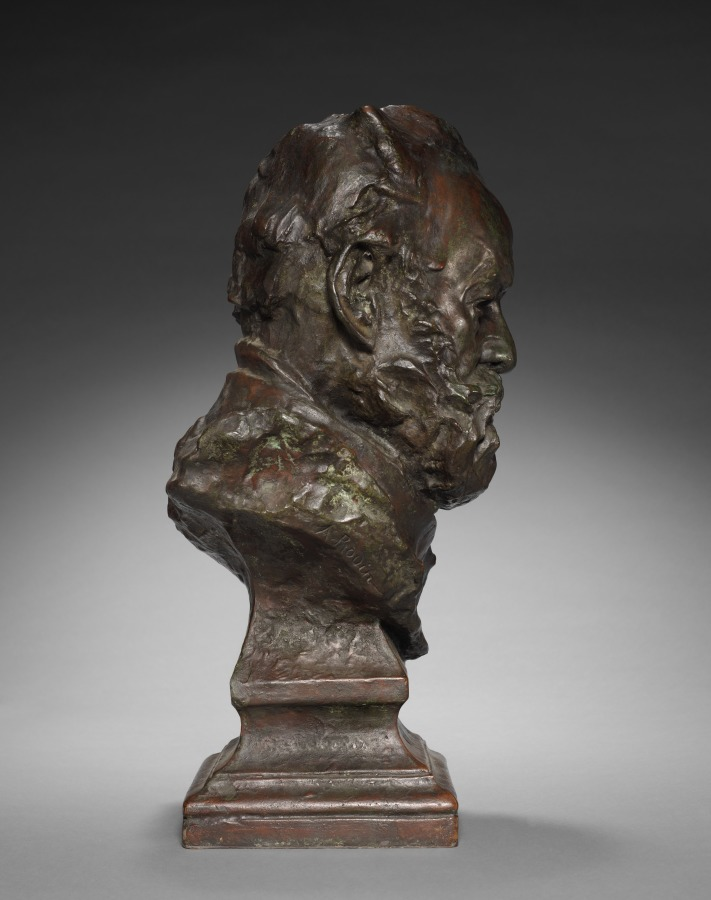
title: Bust of Victor Hugo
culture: France, 19th century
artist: Auguste Rodin (French, 1840–1917)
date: 1883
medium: bronze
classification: Sculpture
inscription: Signed beneath fold of drapery to left: "A. Rodin"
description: Unlike most of Rodin’s portraits, the bust of Victor Hugo (1802–1885) was made from memory because the famous French writer refused to sit for the artist. Among Hugo’s best-known novels are The Hunchback of Notre Dame (1831) and Les Misérables (1862).